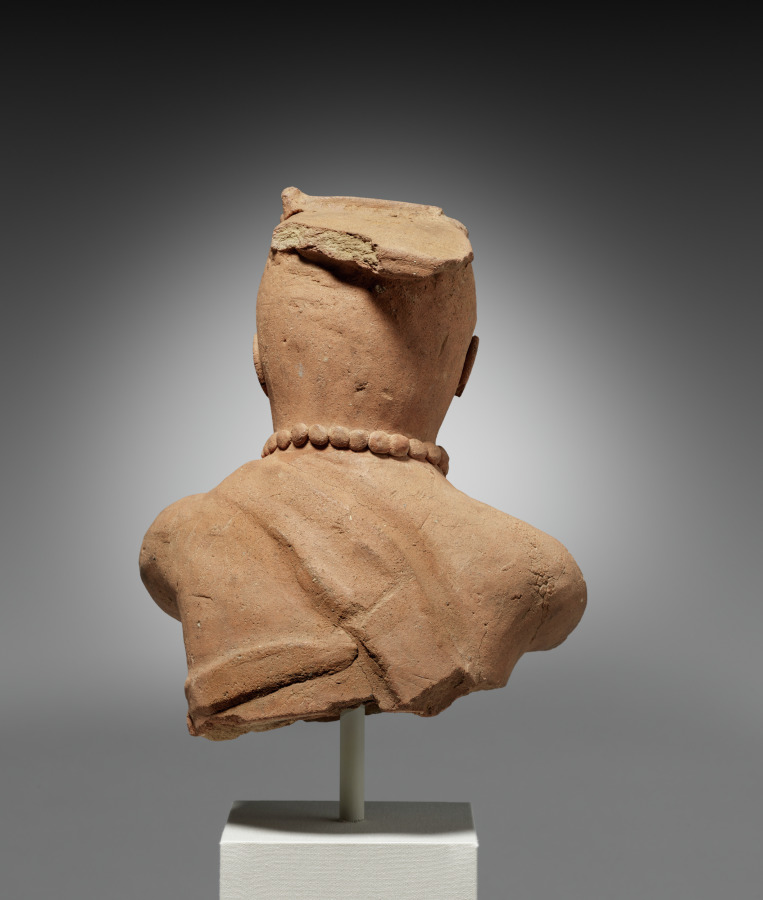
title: Haniwa Figure of a Female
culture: Japan, Kofun period (300–710 CE)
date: 500s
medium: earthenware with traces of pigment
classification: Sculpture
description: Figures in a variety of dress including military and ceremonial garb start to appear on Japanese earthen mounded tombs called old mounds (kofun) from the 400s to 500s CE. This fragment depicts a woman with red triangles on her face and wearing jewelry. Archaeologists speculate that the facial markings had a ritual or symbolic function, perhaps indicating she is a female shaman. Many figures of this kind have been found in digs in the Kanto region of eastern Japan. We can only guess at the meaning of the clay cylinders called haniwa.